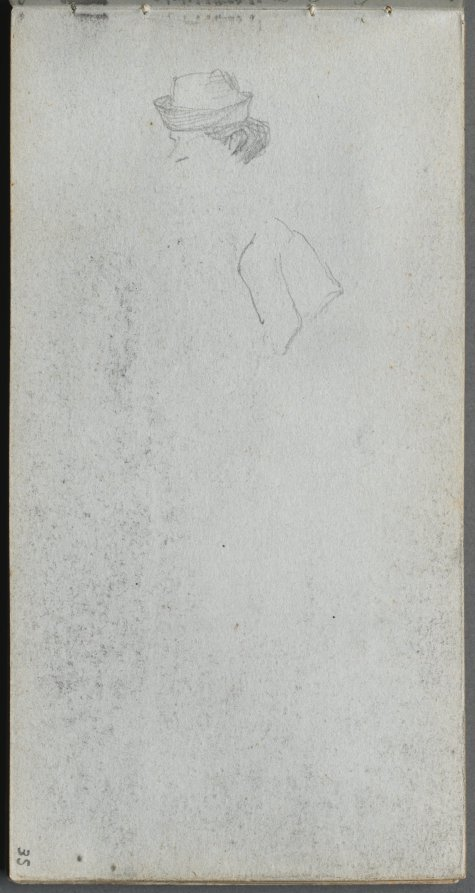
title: Sketchbook, page 35: Study of a Head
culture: France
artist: Ernest Meissonier (French, 1815–1891)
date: c. 1860s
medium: graphite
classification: Bound Volume